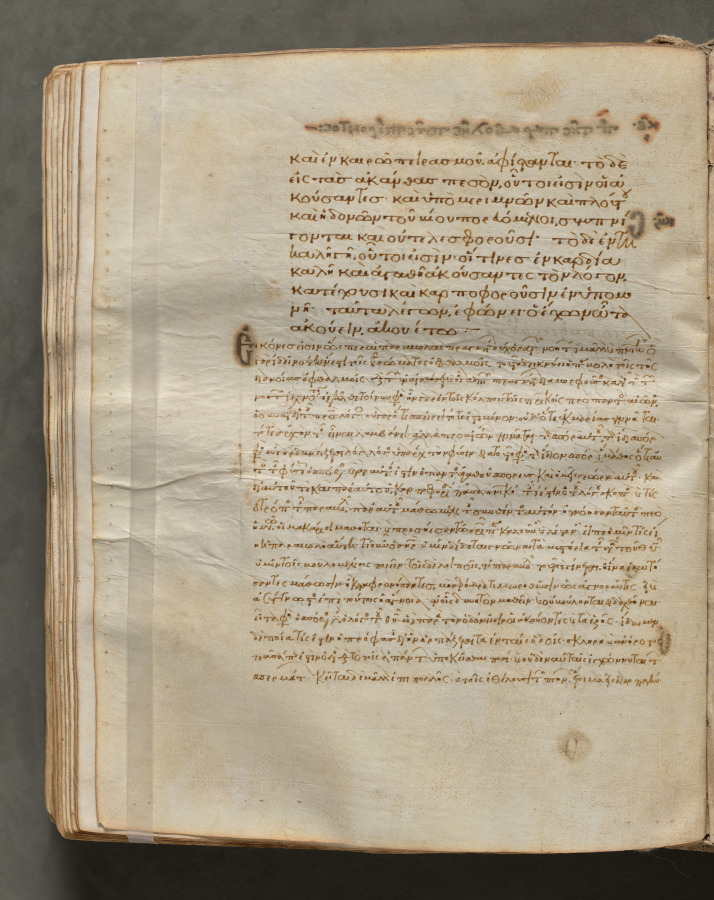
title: Text, folio 238 (verso), from a Gospel Book with Commentaries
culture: Byzantium, Constantinople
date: c. 1000–1100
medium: ink, tempera, and gold on vellum; leather binding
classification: Bound Volume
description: Each of the four gospels in this book opens on a page with brilliantly illuminated borders depicting the author of the text as well as birds—principally peacocks, symbols of the immortality of the soul—and fountains, representing the fountain of life and the salvation of the soul. This volume consists of 428 leaves with texts in Greek. Its level of sophistication suggests that it was probably written and decorated in a monastery in Constantinople.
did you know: Gospel books were carried in procession through Byzantine churches.